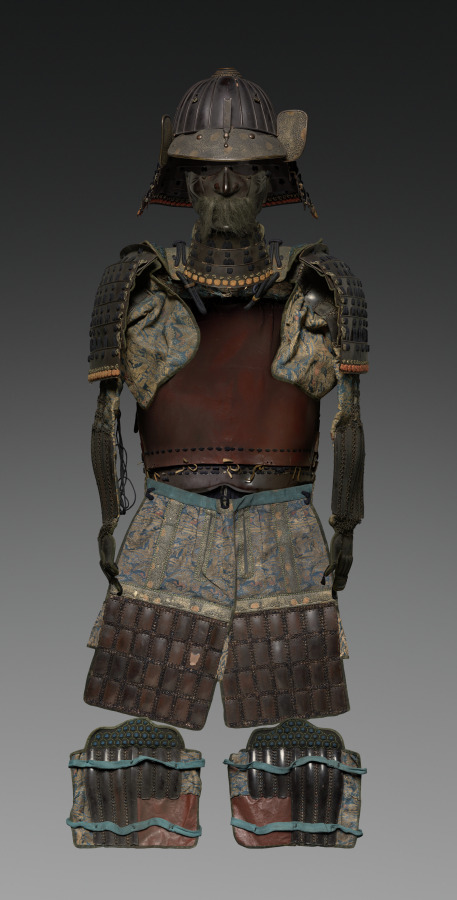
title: Suit of Armor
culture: Japan, Edo period (1615–1868)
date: 1615–1868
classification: Arms and Armor